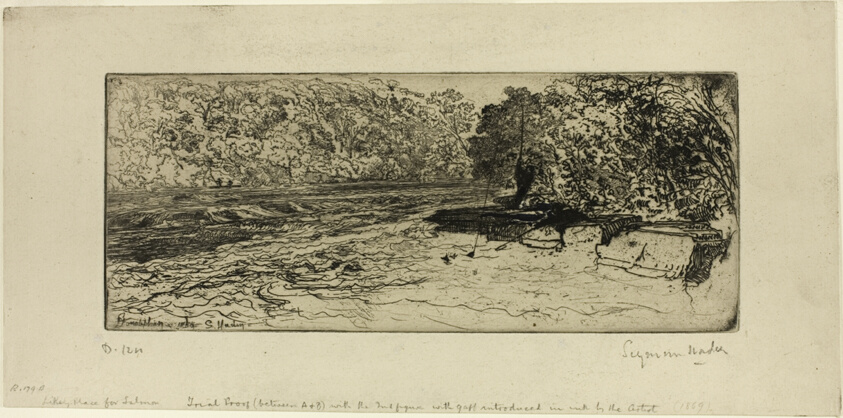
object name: Print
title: A Likely Place for a Salmon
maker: Francis Seymour Haden (English, 1818-1910)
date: c. 1869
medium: Etching and drypoint on cream wove paper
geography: England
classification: etching; print; prints and drawing